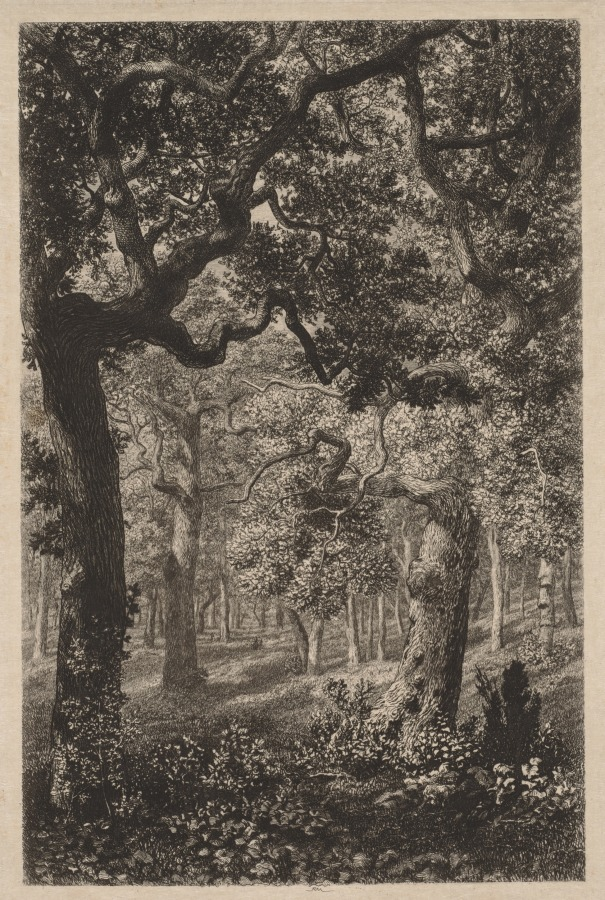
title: In the Woods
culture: France, 19th century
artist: Adolphe Théodore Jules Martial Potémont (French, 1828–1883)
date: c. 1865–75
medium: etching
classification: Print